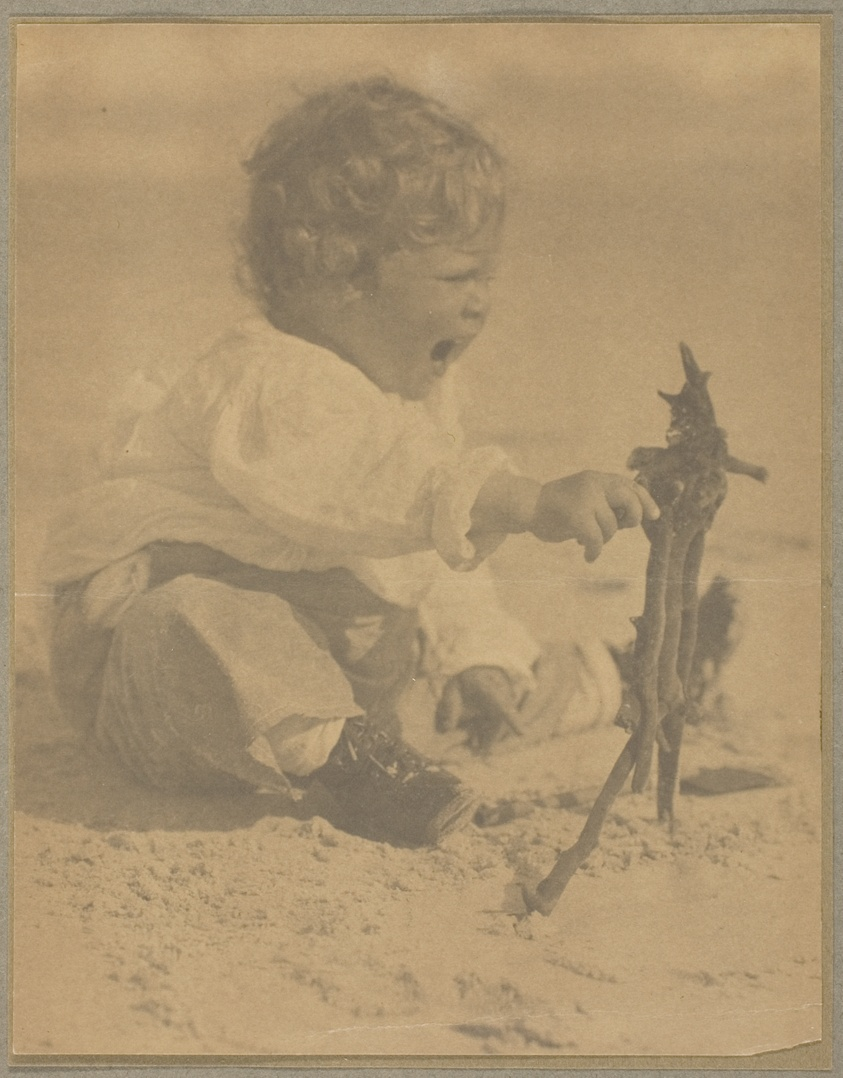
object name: Photograph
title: Aileen Flannery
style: Pictorialism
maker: Alfred Stieglitz (American, 1864–1946)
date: 1902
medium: Platinum print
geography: United States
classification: platinum print; photographic process; photography; photograph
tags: Collected by Hugh Edwards